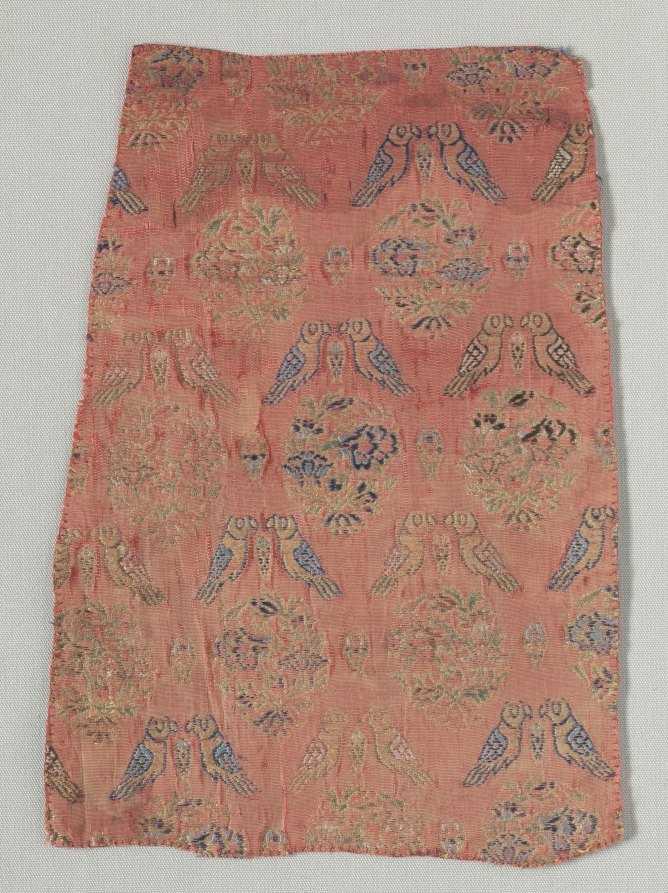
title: Fragment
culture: Iran, 18th century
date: 1700s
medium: brocade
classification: Textile